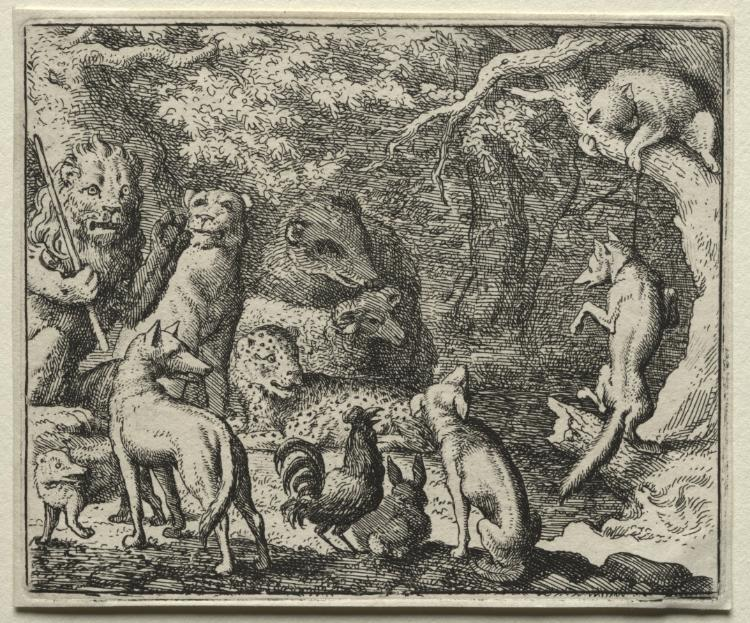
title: Reynard the Fox: Reynard Asks Permission to Confess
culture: Netherlands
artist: Allart van Everdingen (Dutch, 1621–1675)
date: 1650–75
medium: etching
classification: Print